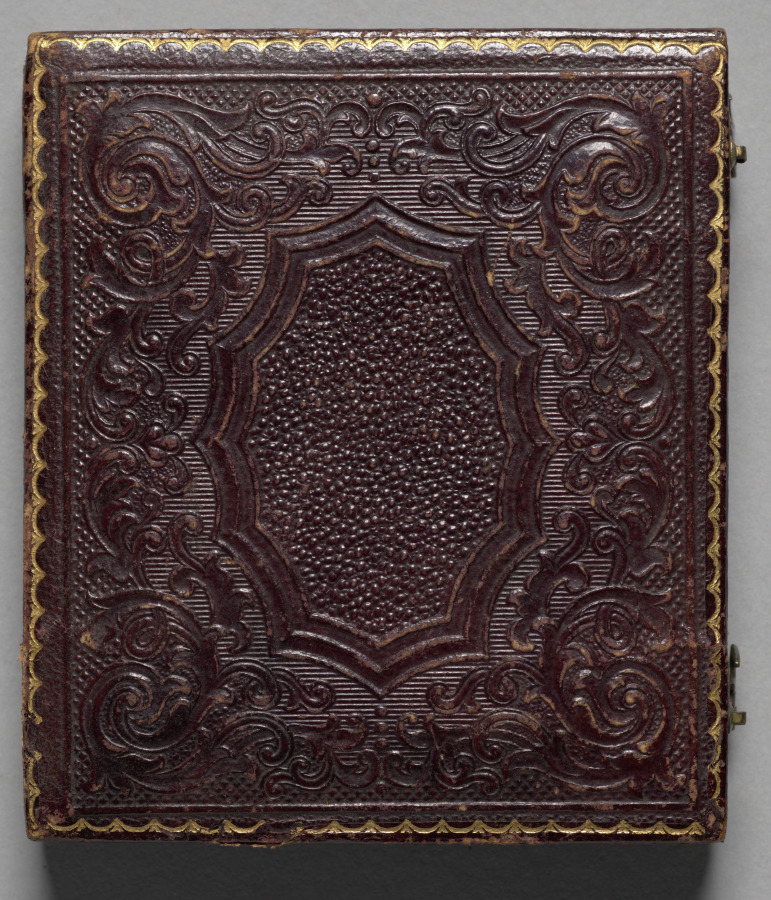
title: Seated couple in mourning attire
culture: America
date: c. 1856–58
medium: daguerreotype, sixth plate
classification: Photograph